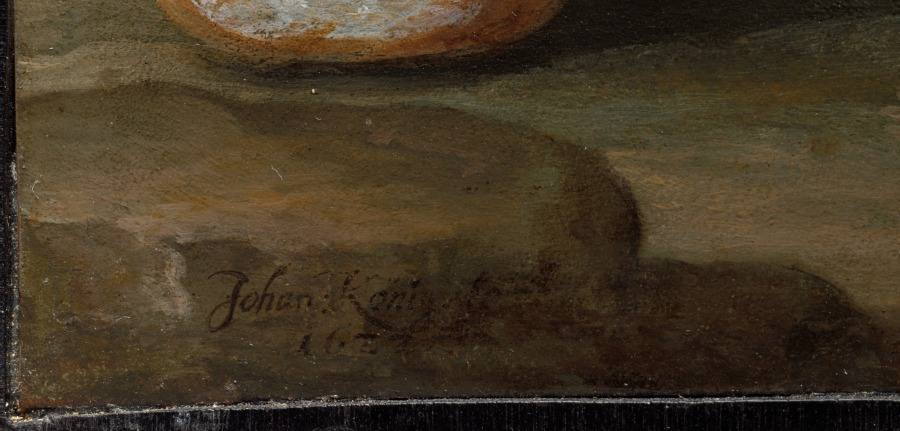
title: The Resurrection of Christ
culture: Germany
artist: Johann König (German, 1586–1642)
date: 1622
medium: oil on copper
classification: Painting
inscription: Signed and dated lower left: Johan. : König / 1622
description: According to Christian belief, three days after his death by crucifixion, Christ rose from the dead and ascended into heaven. König’s interpretation of this traditional theme employs vivid colors and explosive poses to express the drama of the event. Meticulous brushwork delineates exquisite details, and draws attention to the luminous landscape and the three holy women hastening towards Christ’s vacant tomb.